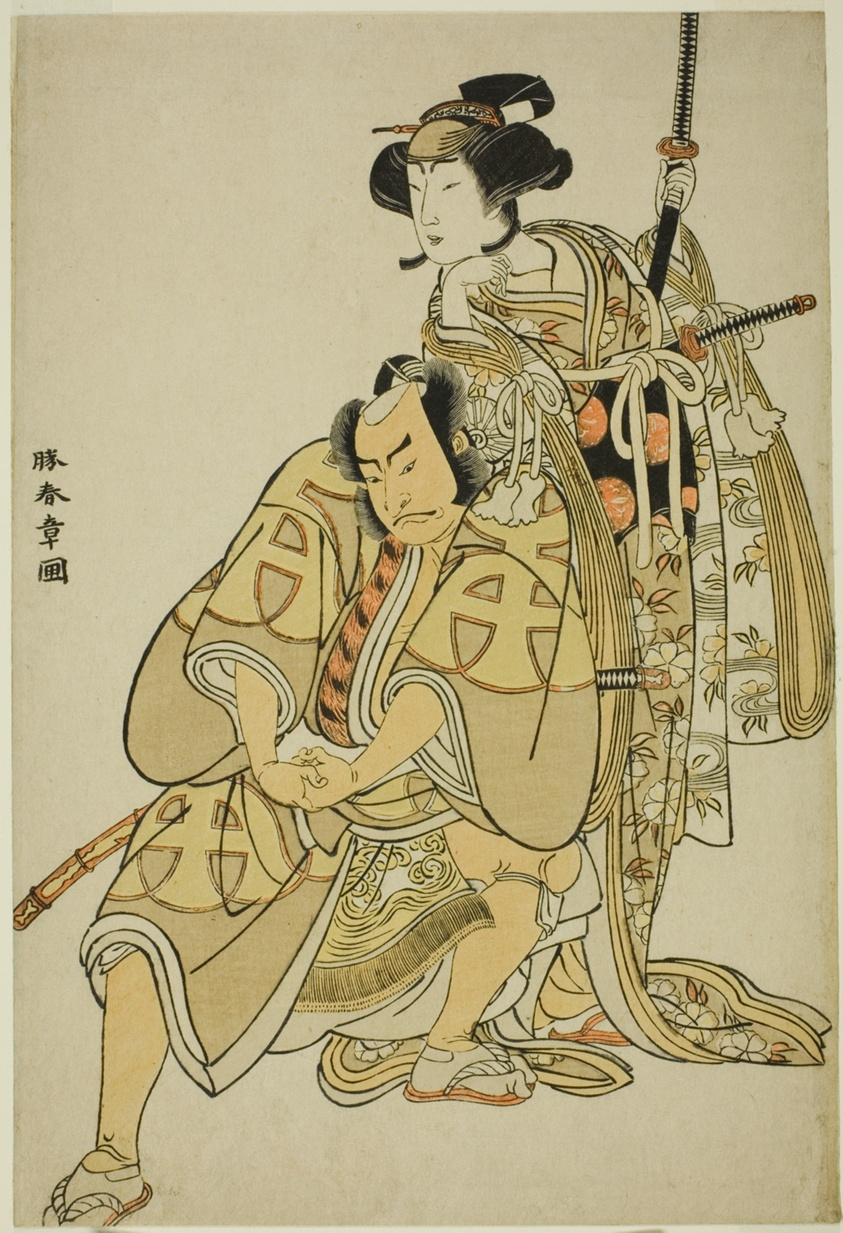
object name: Print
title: The Actors Nakamura Nakazo I as Hata Rokurozaemon Disguised as the Samurai's Manservant (Yakko) Igaguri Hanehei (left), and Nakamura Noshio I as the Lady-in-Waiting Koto no Naishi (right), in the Dance Sequence "Sodegasa Momiji no Tekuda" (Umbrella Sleeves: Coquettish Tricks at Maple Time), from the Fourth Act of the Play Hikitsurete Yagoe Taiheiki (The War Tale Taiheiki: With Din and Clamor of Battle), Performed at the Morita Theater in the Eleventh Month, 1776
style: Japanese (culture or style)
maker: Katsukawa Shunsho 勝川 春章; Japanese, 1726-1792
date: c. 1776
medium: Color woodblock print; aiban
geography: Japan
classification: woodblock print; print; asian art